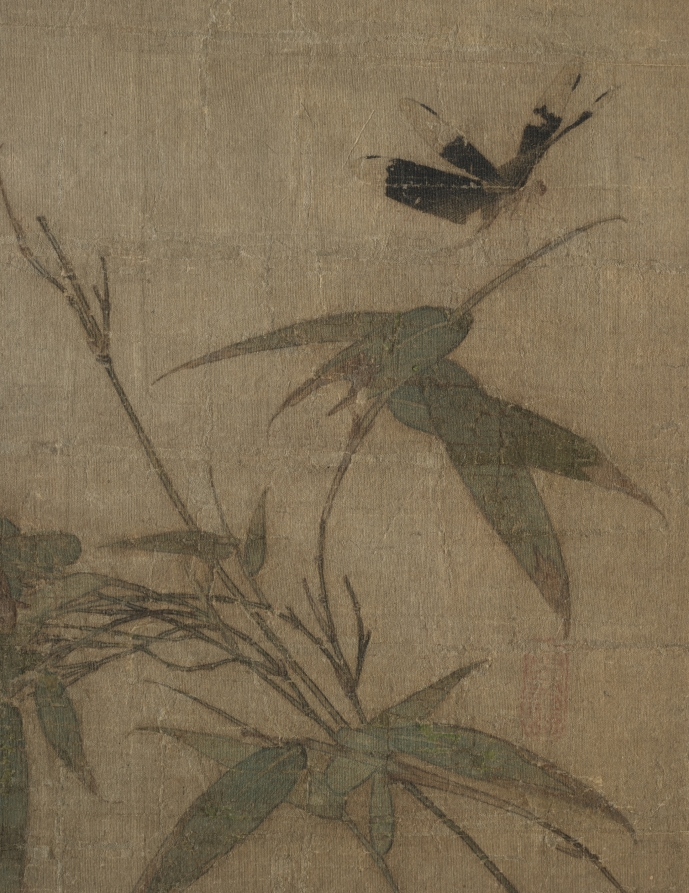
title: Insects and Bamboo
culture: China, Southern Song dynasty (1127–1279)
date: 1200s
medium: Album leaf; ink and light color on silk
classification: Painting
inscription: 1 unidentified seal.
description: This painting represents a microcosm (a world in small) of the Jiangnan ecosystem: while the bush cricket feeds on bamboo, the male widow-skimmer dragonfly is a predator of small insects like mosquitos. Mosquitoes, abundant in late summer and early autumn, suggest the fall season.